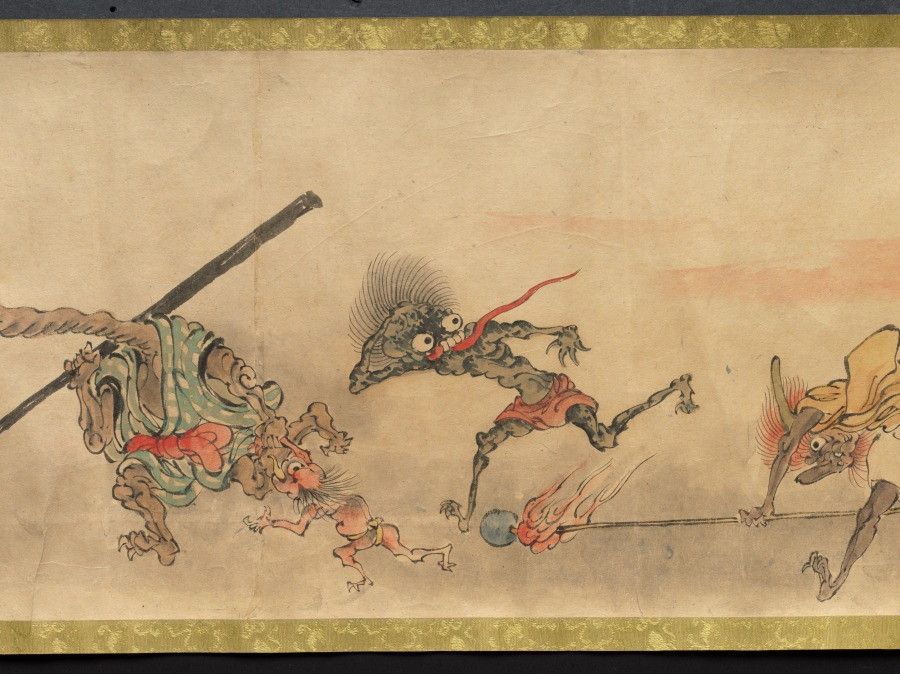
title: An Illustrated Marriage of Apparitions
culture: Japan, Edo period (1615–1868)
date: mid-1800s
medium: handscroll; ink and color on paper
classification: Painting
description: The matchmaking, engagement, wedding, and birth of the first child of two apparitions, or bakemono, literally "things that change," are illustrated in this whimsical, humorous handscroll. Japanese folklore abounds with such strange creatures, most famously represented in handscrolls featuring a procession of 100 supernatural monsters. Aside from a textual preface and cartouches indicating the content of the scenes, the tale is told visually. The artist and whereabouts of the original handscroll are unknown, but a number of other 19th-century copies by amateur painters exist in Japanese collections, attesting to its broad appeal.